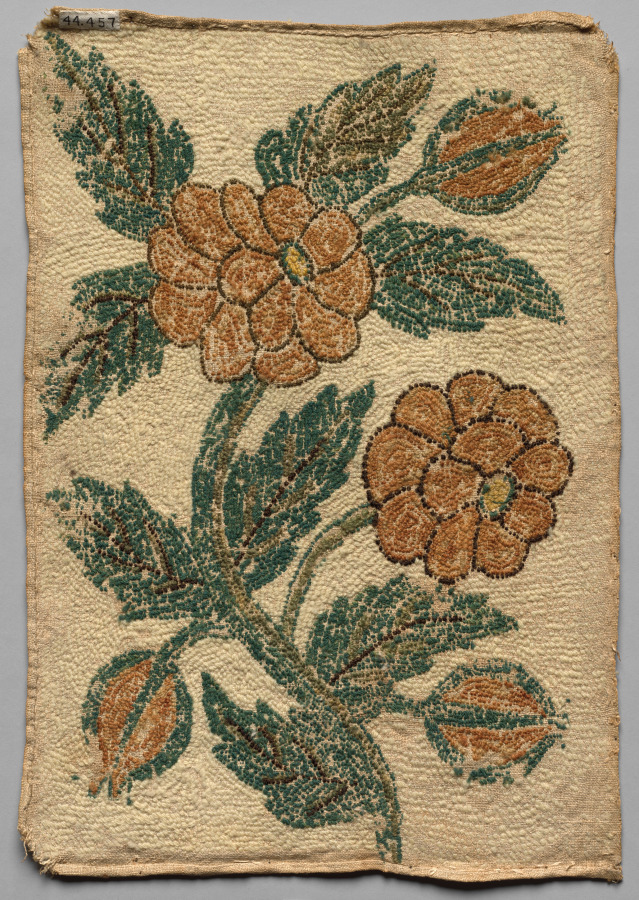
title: Hooked Panel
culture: America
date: 1700s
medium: hooked wool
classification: Embroidery